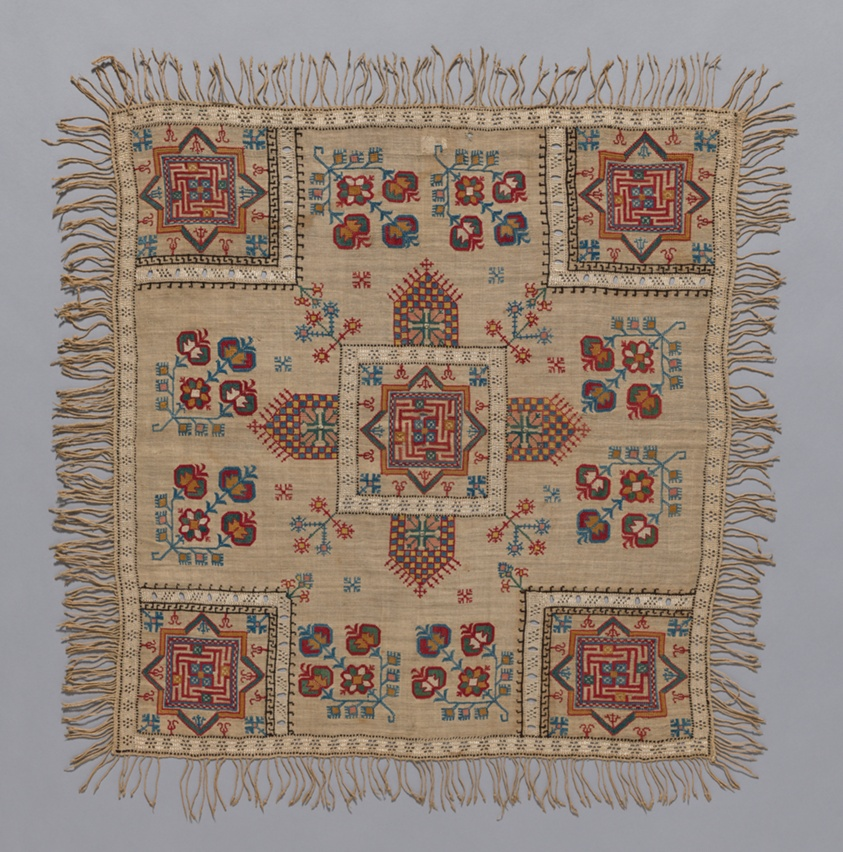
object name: Textile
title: Square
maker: Armenia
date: 18th century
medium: Embroidered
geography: Armenia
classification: textile; needlework (visual works)